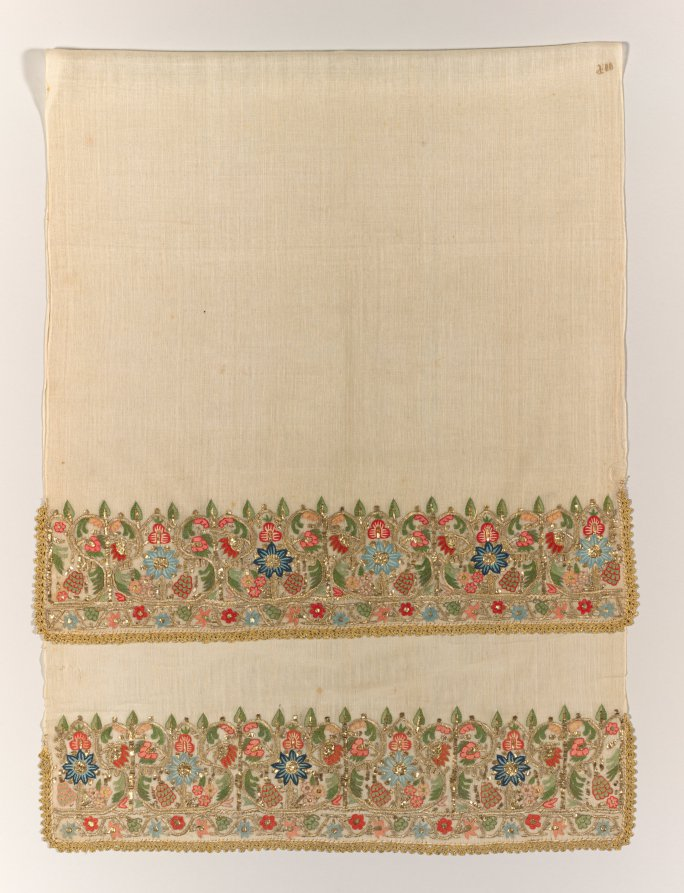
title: Embroidered towel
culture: Turkey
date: 1800s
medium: plain weave: linen; embroidery, double-running stitch: silk, gilt-metal strips and thread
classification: Embroidery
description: Fine Turkish towels with beautiful floral decoration embroidered across each end are often reversible, and their quality revealed the owner’s wealth and status. A lady was required by Turkish etiquette to use a napkin “daintily over the tips of her fingers,” lest she lose her social standing. Towels were not only essential components of everyday life but also gifts, prizes, and decorations. Embroideries could also depict images of daily life. Colorful tents and buildings in floral landscapes, here enriched with shiny gilt-metal strips, adorn the four sides of a head scarf that was worn either folded or unfolded and fastened beneath the chin. Square embroideries also served to wrap gifts, letters, and objects; the 19th-century English traveler Charles White commented that “no present is made . . . unless folded in a handkerchief, embroidered cloth, or piece of gauze. The more rich the envelope, the higher the compliment to the receiver.”